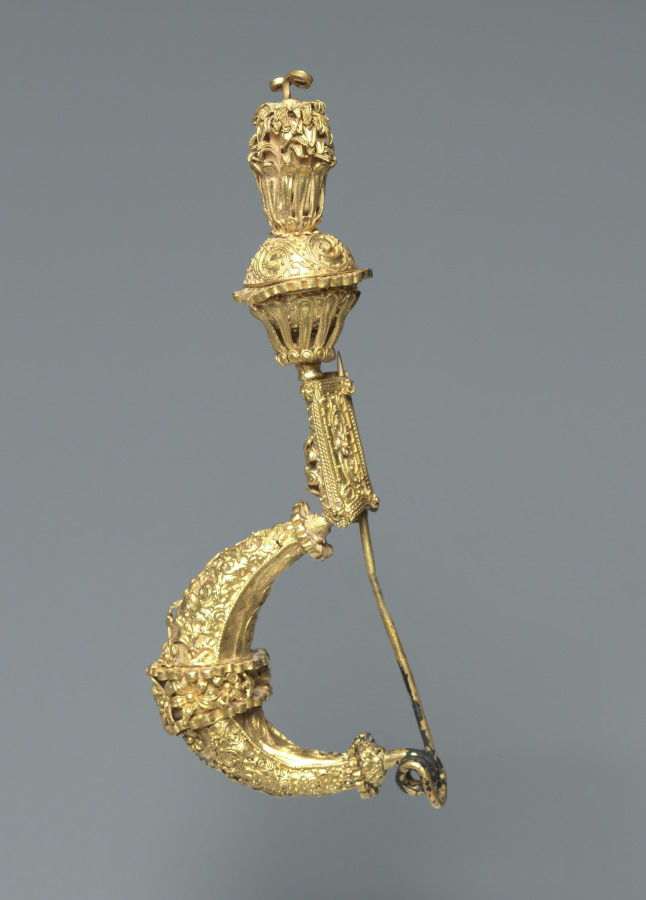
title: Fibula (Pin)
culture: South Italy, Campania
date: 400–200 BCE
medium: gold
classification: Jewelry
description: This extravagant fibula, likely used to fasten garments, is decorated with gold rosettes and vines. An enormous leech-shaped bow and pin form the body of the fibula. A band of rosettes adorns the center of the bow. Above the bow, a gold plaque is adorned with an eight-petaled flower and palmette filigree. A gold bead, perhaps representing a pomegranate, tops the plaque. The bead is crowned with oblong petals and sprouting leaves.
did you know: This fibula’s elaborate surface includes soldered gold wire and granulated spheres.